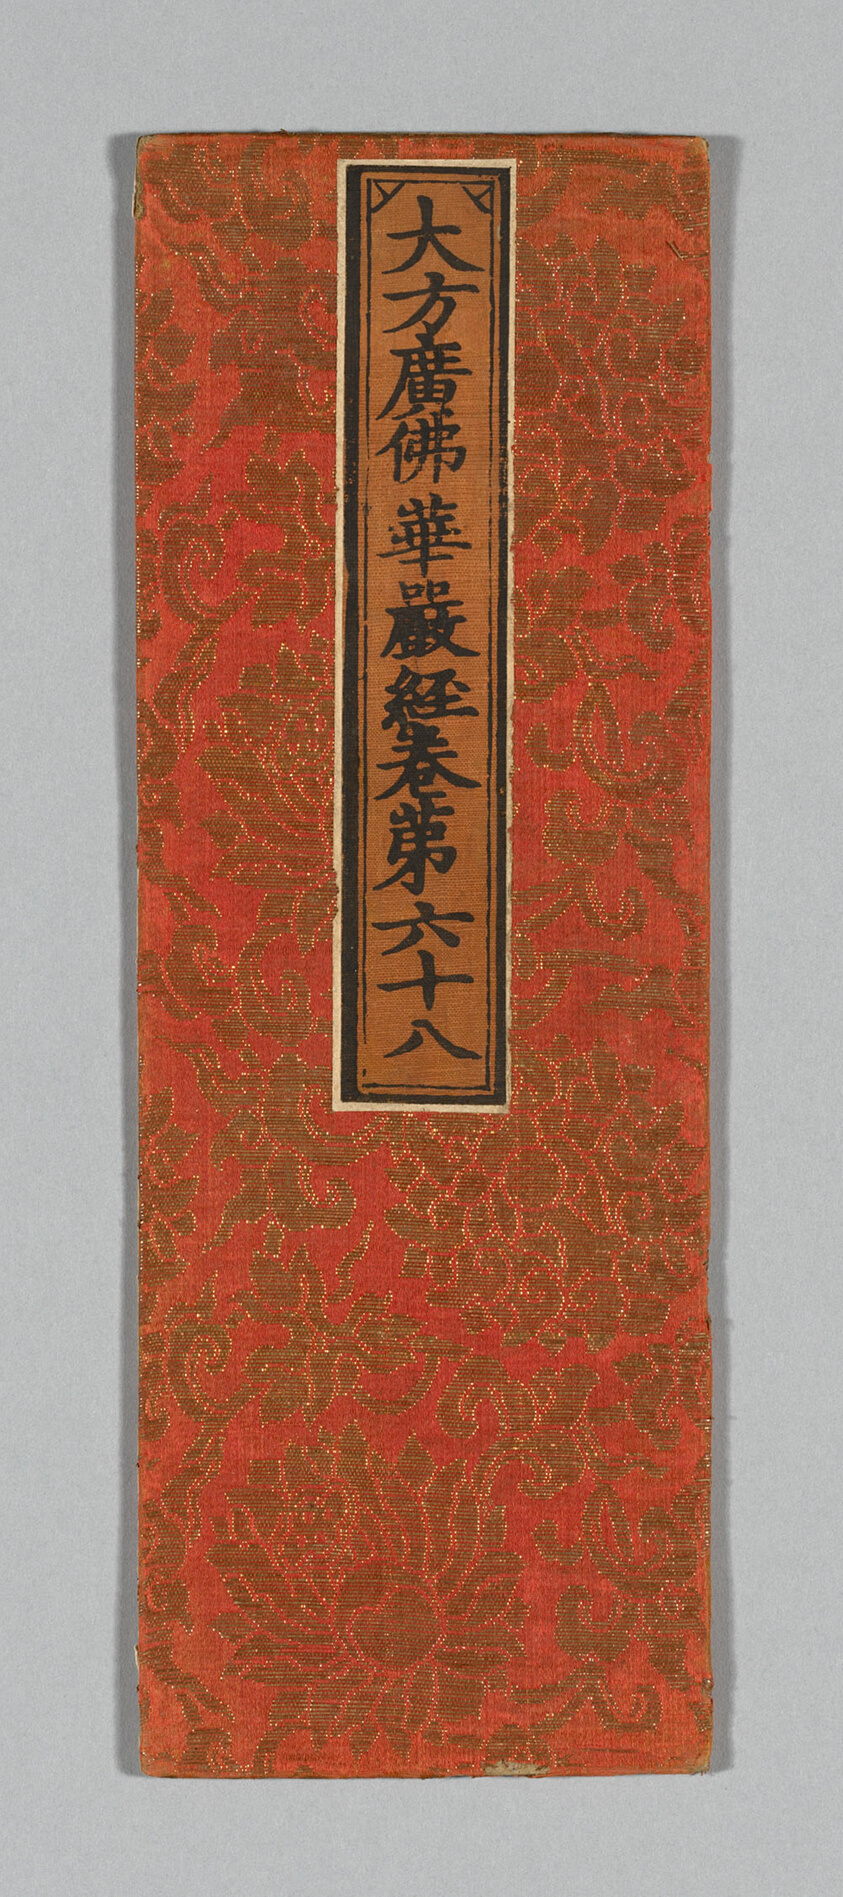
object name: Textile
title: Sutra Cover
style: ming, Chinese (culture or style), East Asian, asian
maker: China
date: Ming dynasty (1368–1644), c. 1590's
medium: Silk, gold-leaf-over-lacquered-paper strips, warp-float faced 4:1 satin weave with supplementary patterning wefts bound in 1:4 weft float faced satin interlacings; label: silk, plain weave; painted with ink; over paper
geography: China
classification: textile; weaving